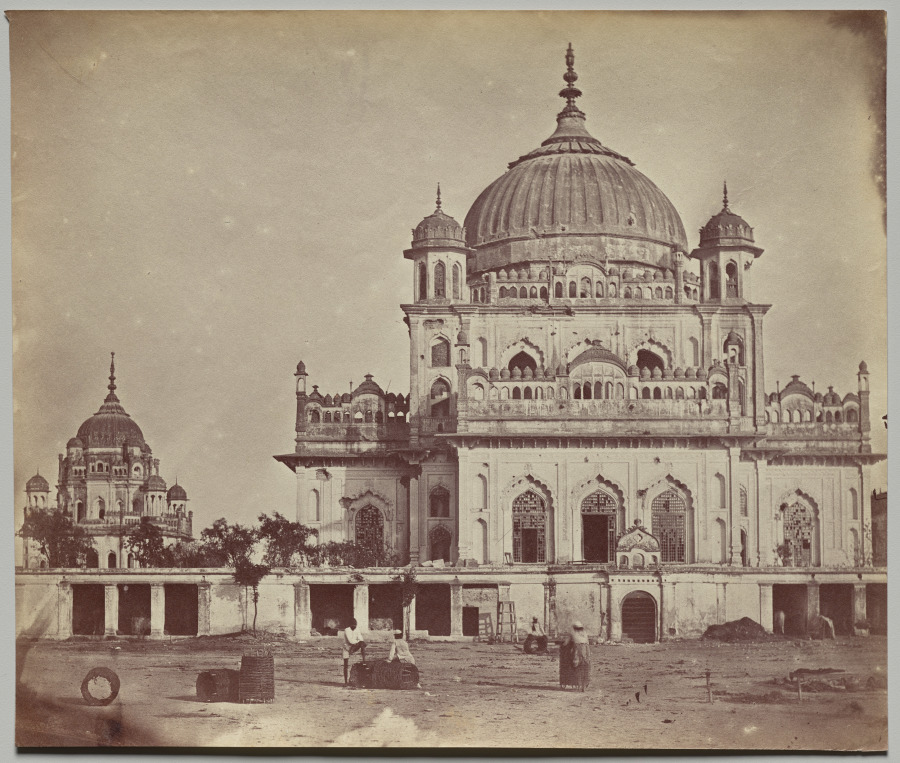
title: Small Mosque in the Kaiserbagh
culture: England, 19th century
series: Lucknow After the Siege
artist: Felice A. Beato (British, 1832–1909)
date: 1858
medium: albumen print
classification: Photograph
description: Built for Wajid Ali Shah (1847–1856), between 1848 to 1850, Kaiserbagh Palace is a fine example of 1800s architecture in Lucknow, northern India. Parts of Kaiserbagh Palace were destroyed during the Indian Rebellion (an uprising against British rule), also known as the First War of Independence in 1857. This photograph captures the small mosque of the palace after the British siege of the city. Mosques are Muslim places of worship, used for five daily prayers, teaching the Qur’an, and community gatherings. The small mosque in the Kaiserbagh complex, however, served primarily the ruler’s family and members of the court.